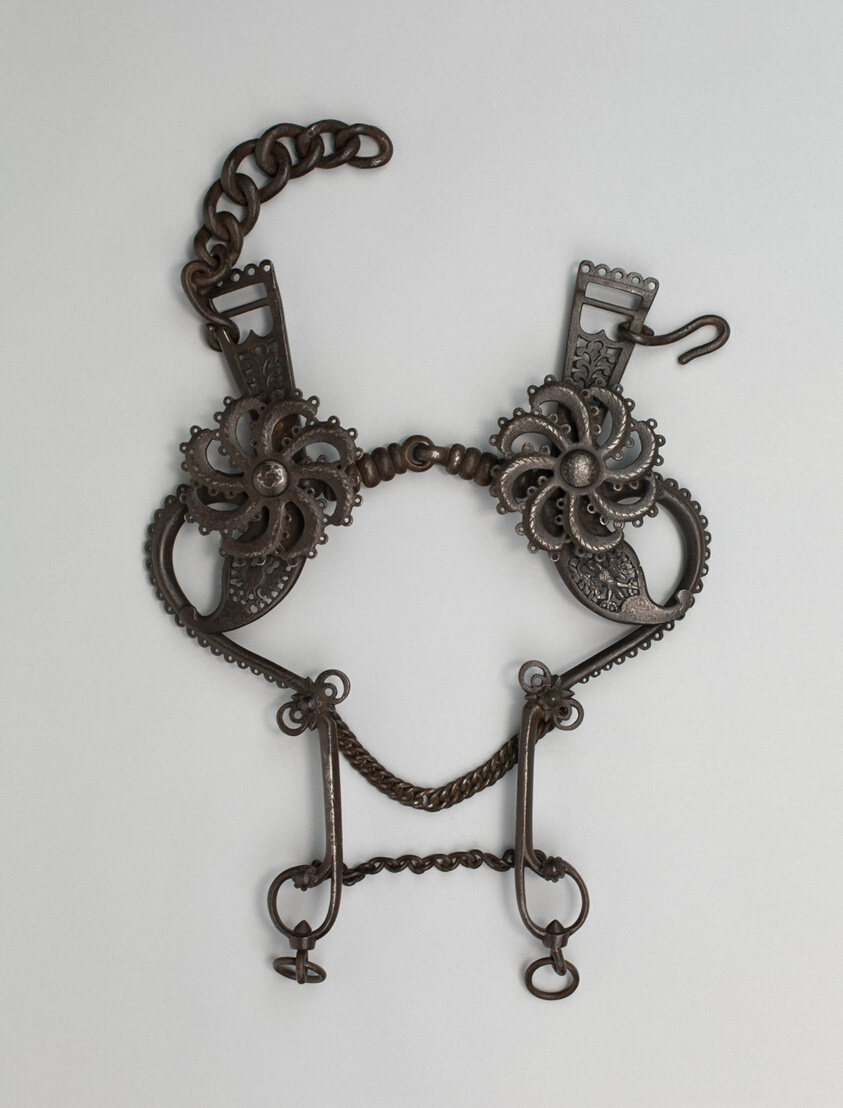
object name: Armor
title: Curb Bit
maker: German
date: 19th century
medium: Iron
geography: Germany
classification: horse equipment; armor; arms and armor